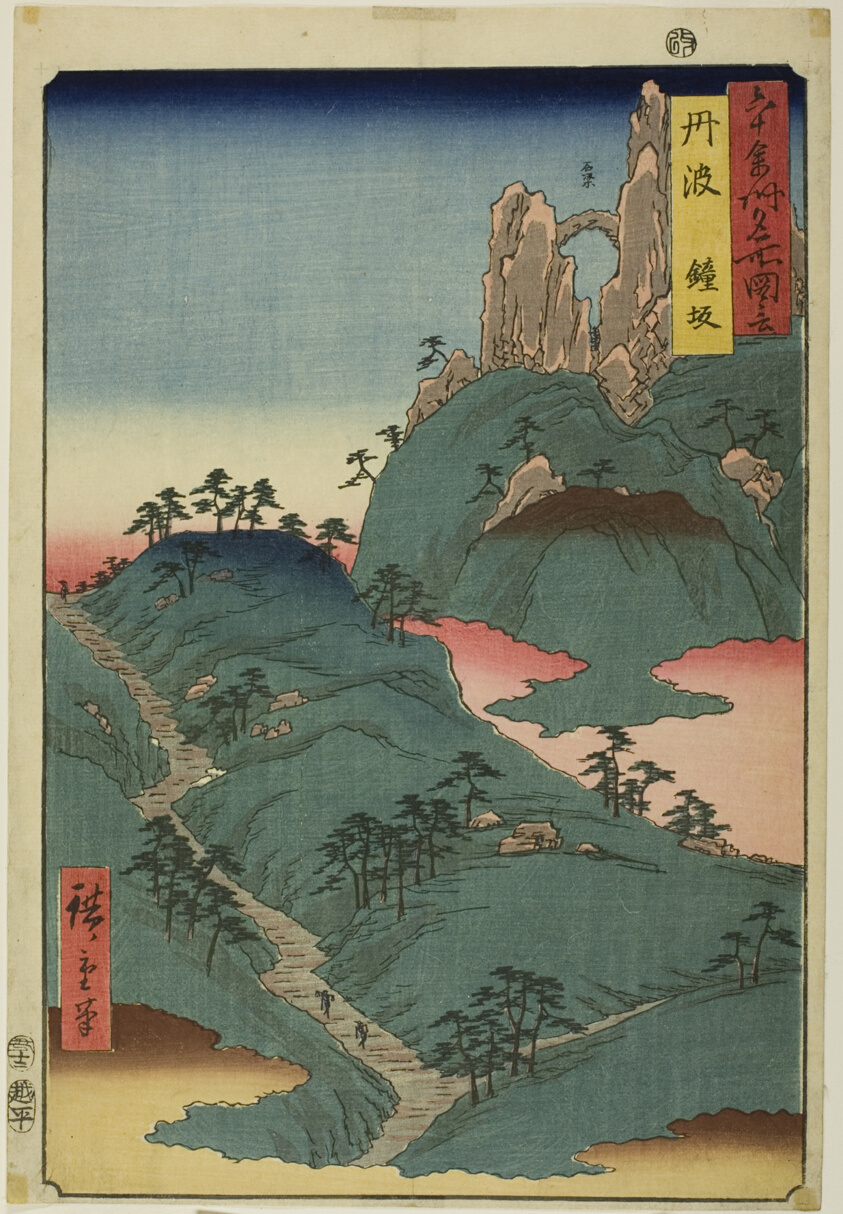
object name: Print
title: Tanba Province: Kane Slope (Tanba, Kanesaka), from the series "Famous Places in the Sixty-odd Provinces (Rokujuyoshu meisho zue)"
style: Japanese (culture or style)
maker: Utagawa Hiroshige 歌川 広重; Japanese, 1797–1858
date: 1853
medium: Color woodblock print; oban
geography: Japan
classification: woodblock print; print